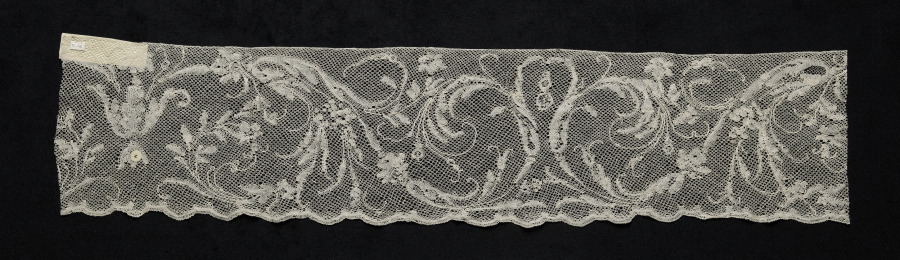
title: Lace Edging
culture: France, Normandy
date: 1700s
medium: Linen: bobbin lace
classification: Lace